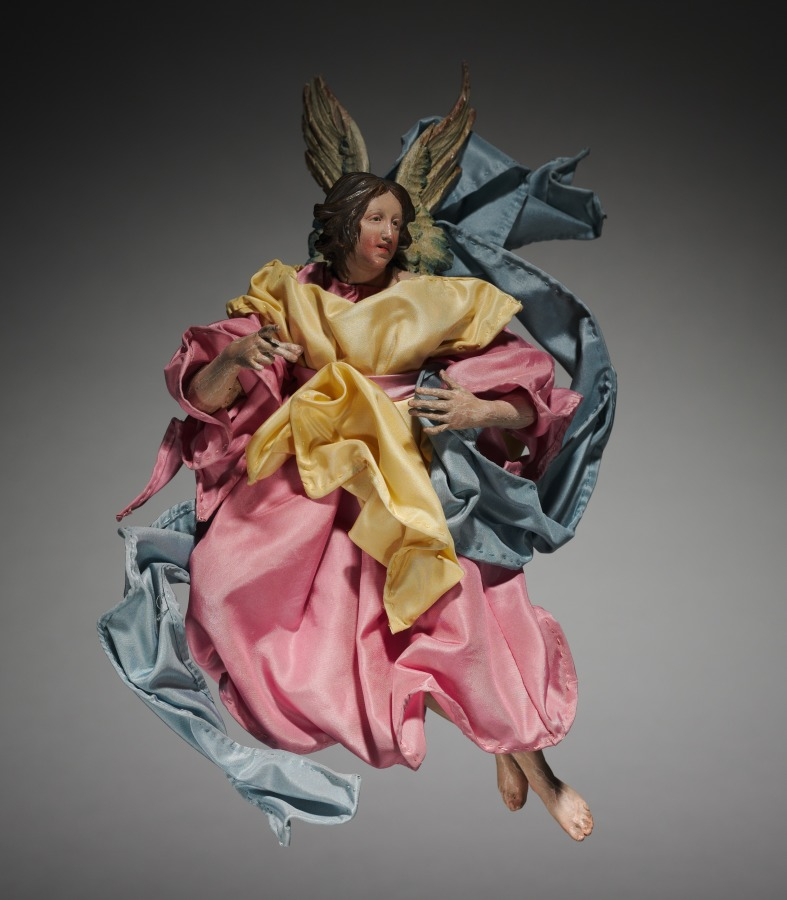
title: Figure from a Crèche: Angel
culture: Italy, Naples, late 18th-early 19th century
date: 1780–1830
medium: painted wood and terracotta with various textiles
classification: Sculpture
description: The practice of creating scenes of the Nativity for the home dates from the early 1700s in Italy, where people began to set up doll-like figures of about a foot or less in height. The custom was particularly popular in Naples around 1800, where crèche scenes (crèche means cradle, or crib) included many figures, whose heads and hands of painted terracotta, stuffed cloth bodies, and clothing adapted from contemporary local costumes gave them an amazingly realistic character. Representations of the birth of Jesus can be traced to the first few centuries of Christianity. Both living creatures and sculptural depictions of them were used from early times. By the late middle ages it was customary to create life-size figures of wood or stone, naturalistically painted, to represent the characters who participated in the events of Jesus's early life. These sculptures were then arranged in scenes illustrating one or both of the most important of these events, the Adoration of the Shepherds and the Adoration of the Magi-the three kings from the East who came to pay homage to the Christ child. Used in churches, these large figures were especially popular in Italy, Central Europe, Spain, and Portugal. This Object in Focus presentation was organized by Henry Hawley, Curator of Renaissance and Later Decorative Arts and Sculpture.